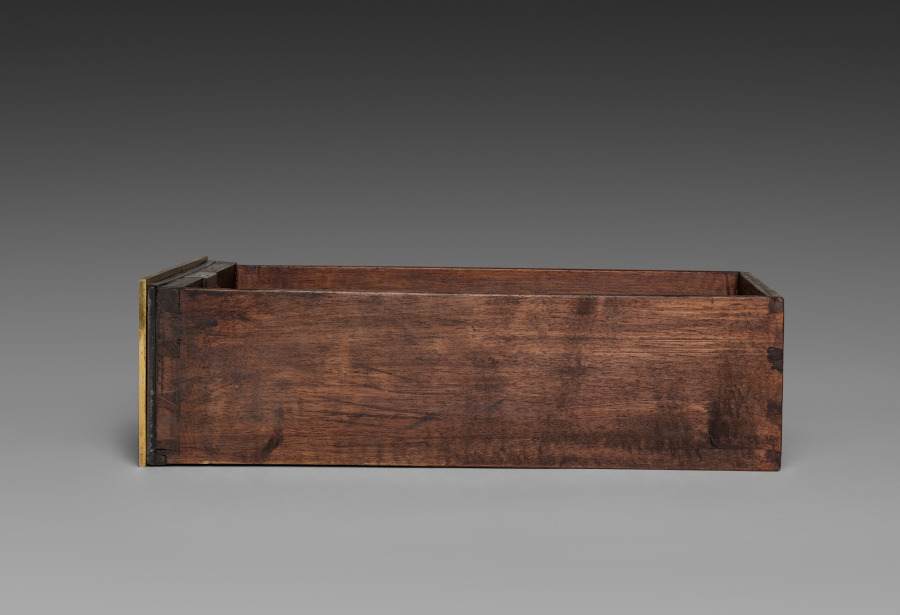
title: Side Drawer for Cabinet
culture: France, late 17th Century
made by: André-Charles Boulle (French, 1642–1732)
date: c. 1690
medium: ebony, marquetry in metal and tortoise shell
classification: Furniture and woodwork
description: Appointed cabinetmaker to King Louis XIV in 1672, André-Charles Boulle became a master of furniture making in France during the late 1600s until his death in 1732. Known primarily for his use of marquetry, in which metal patterns are inlaid into tortoiseshell then applied within the veneered surface of the furniture, Boulle established a level of quality and craftsmanship few others could achieve. As a result, his work found favor at the royal court and among other aristocrats and diplomats eager to impress the king. The inclusion of a medallion depicting Louis XIV within the bronze decoration of this chest would have identified the owner with the royal court. Often exhibiting stout architectural proportions with elegant groups of inlaid motifs such as the parrot on the central panel of this chest, Boulle’s designs are an example of the intellectual fashion for contrasting ideas, materials, and motifs.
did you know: Originally designed to sit atop an elaborate tall stand, this chest was likely altered in the late 1700s to reduce its scale and height.